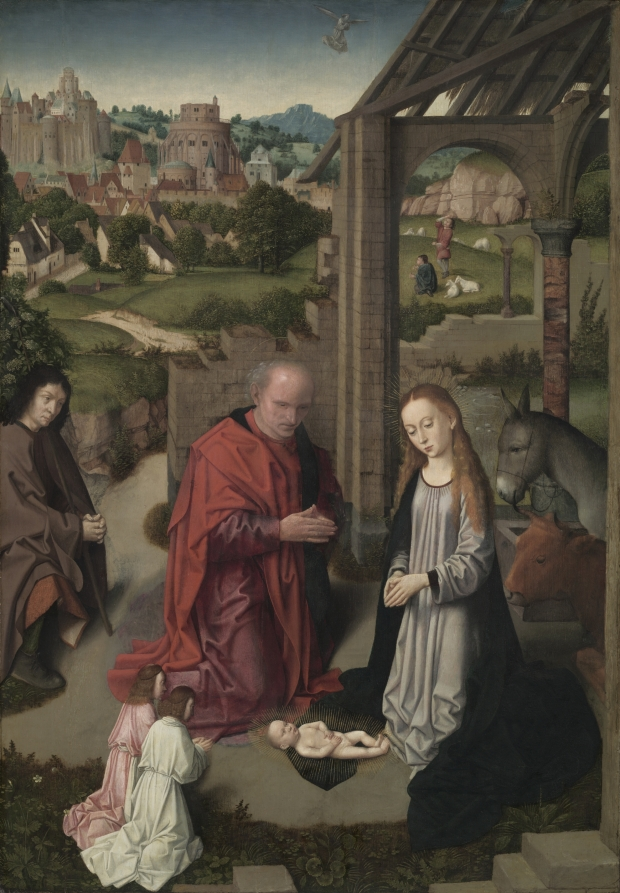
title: The Nativity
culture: Flanders, Bruges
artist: Gerard David (Netherlandish, 1450/60–1523)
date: c. 1485–90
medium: oil on wood panel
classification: Painting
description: The nativity was one of the most frequently depicted subjects in western art. The event marks the entrance of Christ into the world and the fulfillment of Old Testament prophecy. In the distance an angel announces the birth of Christ to the shepherds tending their flocks. One shepherd is already at the stable adoring the Christ child. In the background, the cityscape represents Jerusalem, where Christ would be crucified, represented here as a northern medieval city. Only Matthew and Luke describe Christ’s nativity in the Gospels, which led medieval writers and artists to amplify the event. Some scholars have suggested that the head of Joseph is a donor portrait. Gerard David was born in Oudewater, now located in Utrecht. He spent his mature career in Bruges, where he was a member of the painters’ guild. Upon the death of Hans Memling in 1494, David became Bruges’s leading painter of devotional panels. He was also a manuscript illuminator.